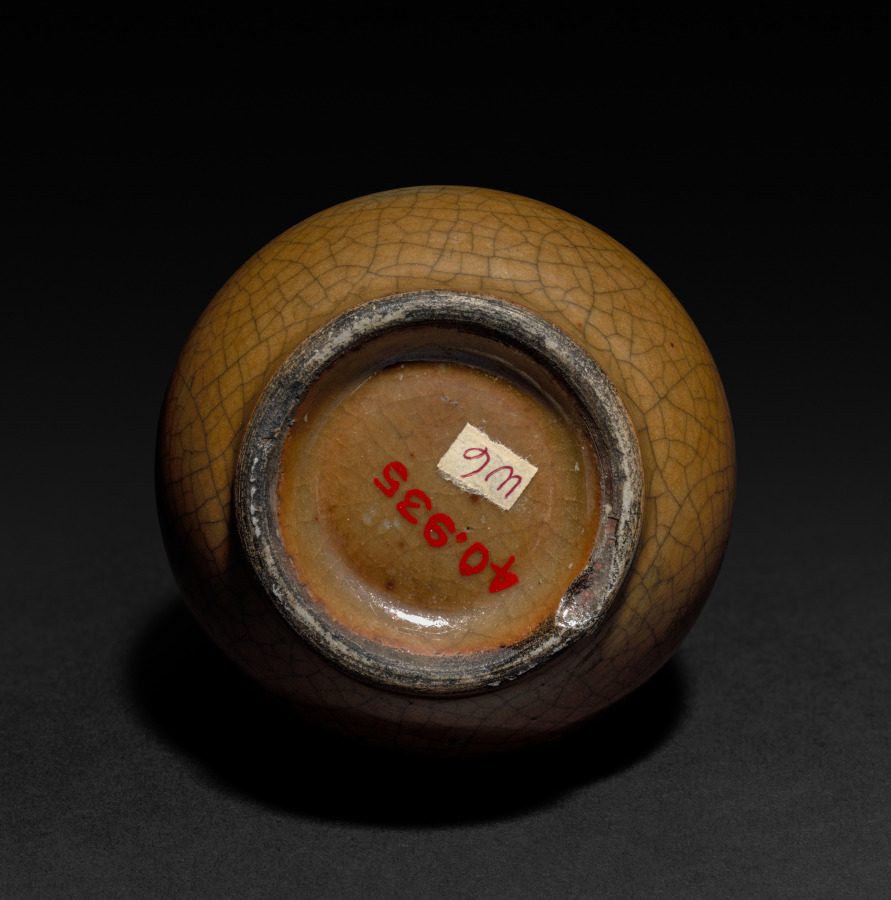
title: Pear-shaped Jar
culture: China, Qing dynasty (1644-1911), Kangxi reign (1661-1722)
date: 1661–1722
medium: porcelain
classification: Ceramic